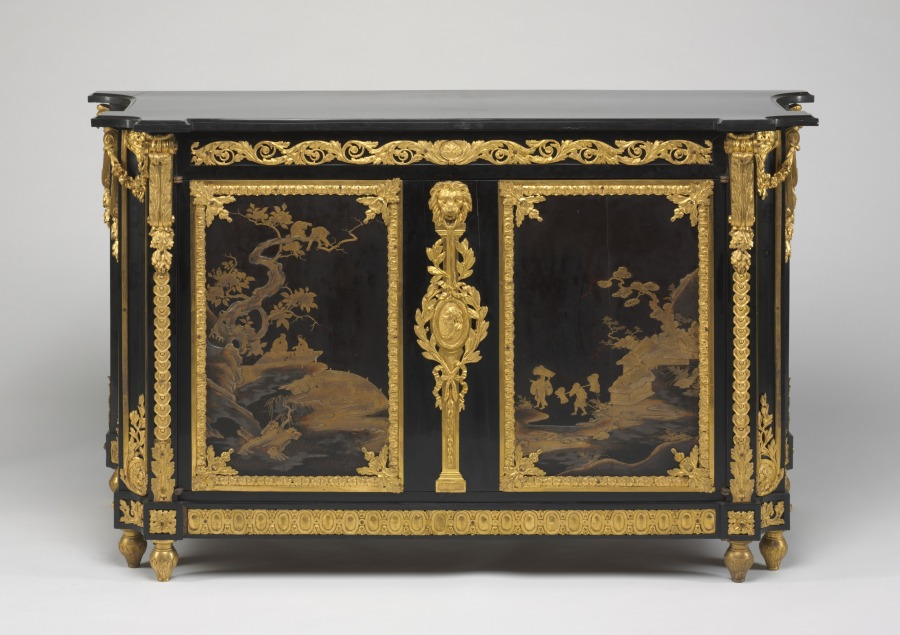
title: Chest of Drawers (Commode)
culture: France, Paris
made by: René Dubois (French, 1737–1798)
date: c. 1765– 1770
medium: ebony veneer with Japanese lacquer panels, gilt bronze mounts, and marble top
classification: Furniture and woodwork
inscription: signed on top front corners: I. Dubois.